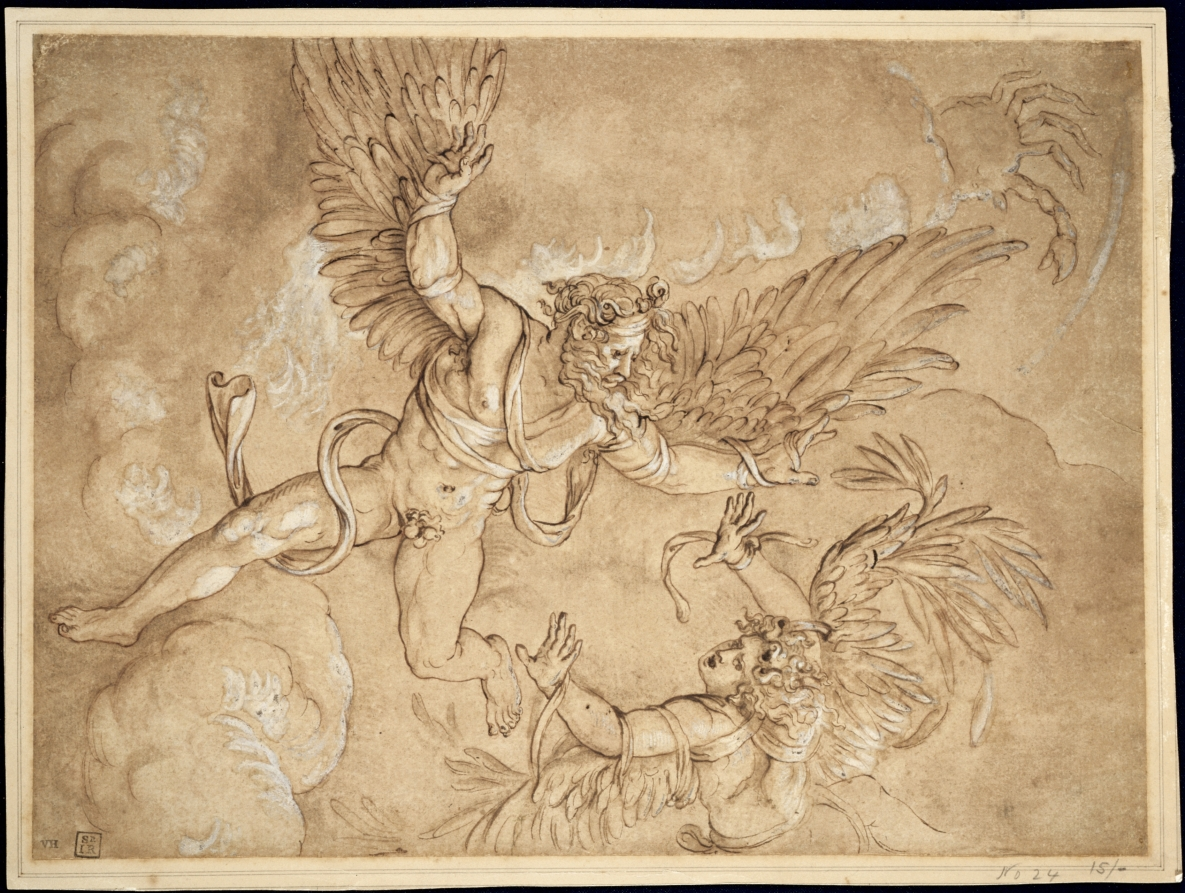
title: Copy after Giulio Romano's Fall of Icarus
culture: Italy, 16th century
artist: after Giulio Romano (Italian, 1492/99–1546)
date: after 1536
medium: pen and brown ink and brush and brown wash over red chalk, heightened with lead white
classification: Drawing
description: Having flown too close to the sun, Icarus plummets from the sky as the wax securing his makeshift wings melts, and the straps unravel. His father Daedelus, who invented the wings, watches in horror as his son begins a deadly fall. Punished for failing to heed his father’s warning and attempting to enter the realm of the gods, Icarus was a moral reminder to Renaissance viewers of human fallibility and the risks of excessive pride.